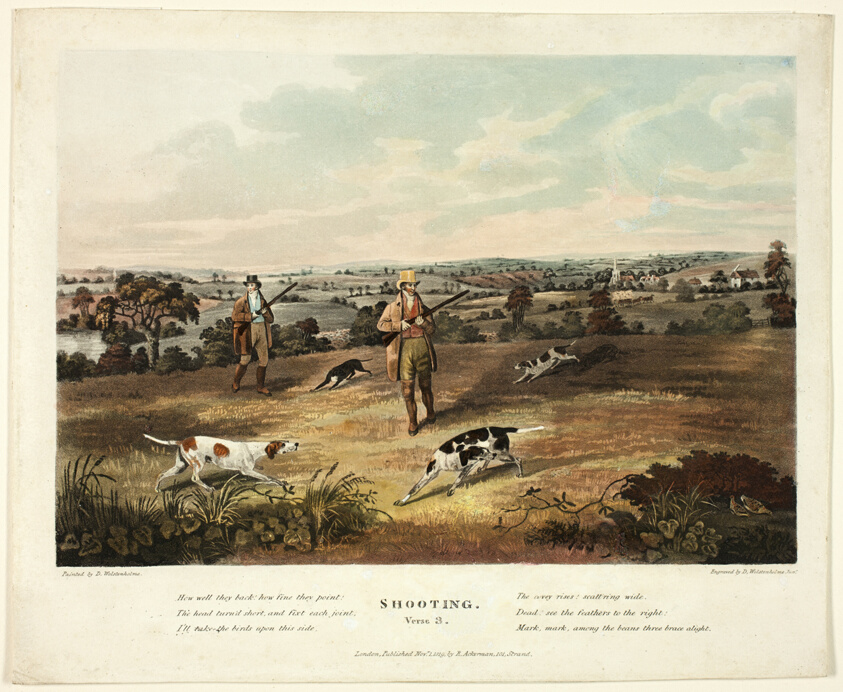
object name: Print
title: Shooting: Verse 3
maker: Thomas Sutherland (English, active c. 1785-1827); after Dean Wolstenholme (English, 1798-1882); published by Rudolph Ackermann (English, born Germany, 1764-1834)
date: 1819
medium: Hand-colored aquatint and etching on ivory wove paper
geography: England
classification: print; prints and drawing